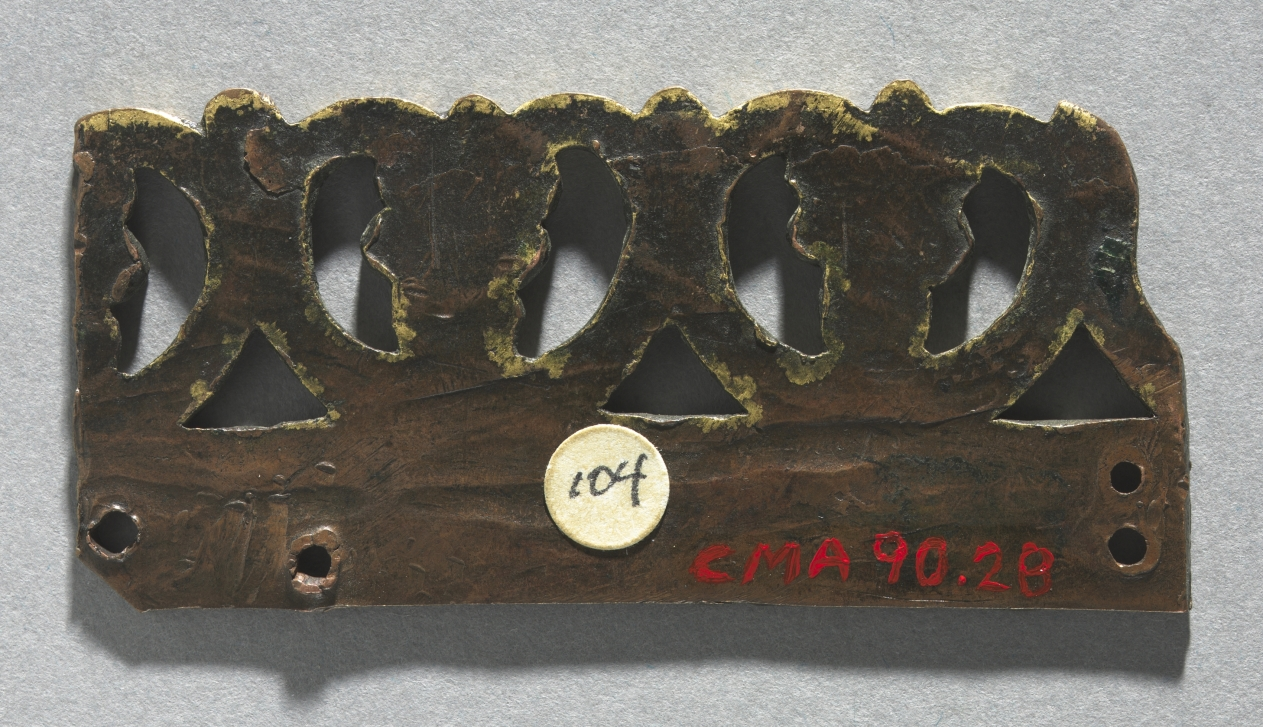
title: Fragment of an Ornamental Crest from a Reliquary Shrine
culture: Mosan, Meuse Valley, Maastricht?, 12th century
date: c. 1165–1180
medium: gilded copper, émail brun (brown enamel)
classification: Metalwork